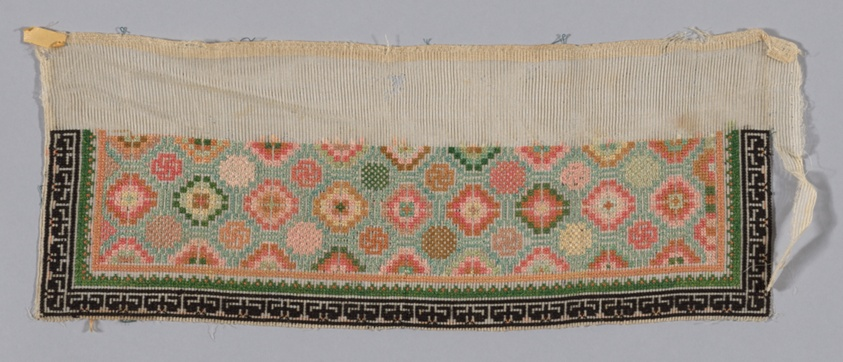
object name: Costume and Accessories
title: Trouser Band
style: qing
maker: Han-Chinese (China)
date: Qing dynasty (1644–1911), 1875/1900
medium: Forty-four pairs and eight odd pieces of embroidered sleeve, ankle bands, etc. on gauze.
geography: China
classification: textile; costume - embroidery; embroidery; costume